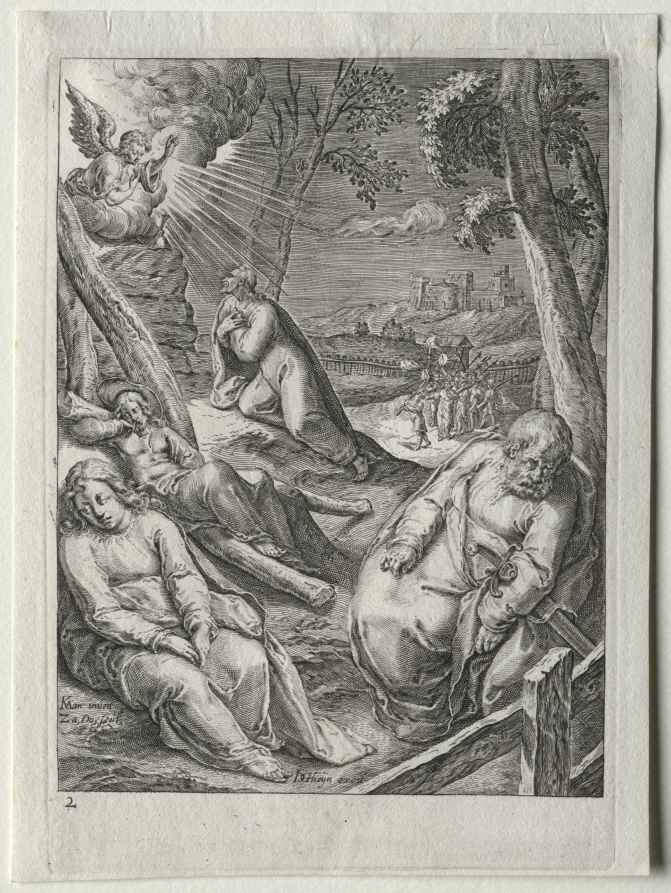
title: Passion Set: Christ on the Mount of Olives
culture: Netherlands, 16th century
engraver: Zacharias Dolendo (Dutch, 1561–1604)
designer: after Karel van Mander I (Dutch, 1548–1606)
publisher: Jacob de Gheyn II (Netherlandish, 1565–1629)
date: 1596–98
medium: engraving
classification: Print